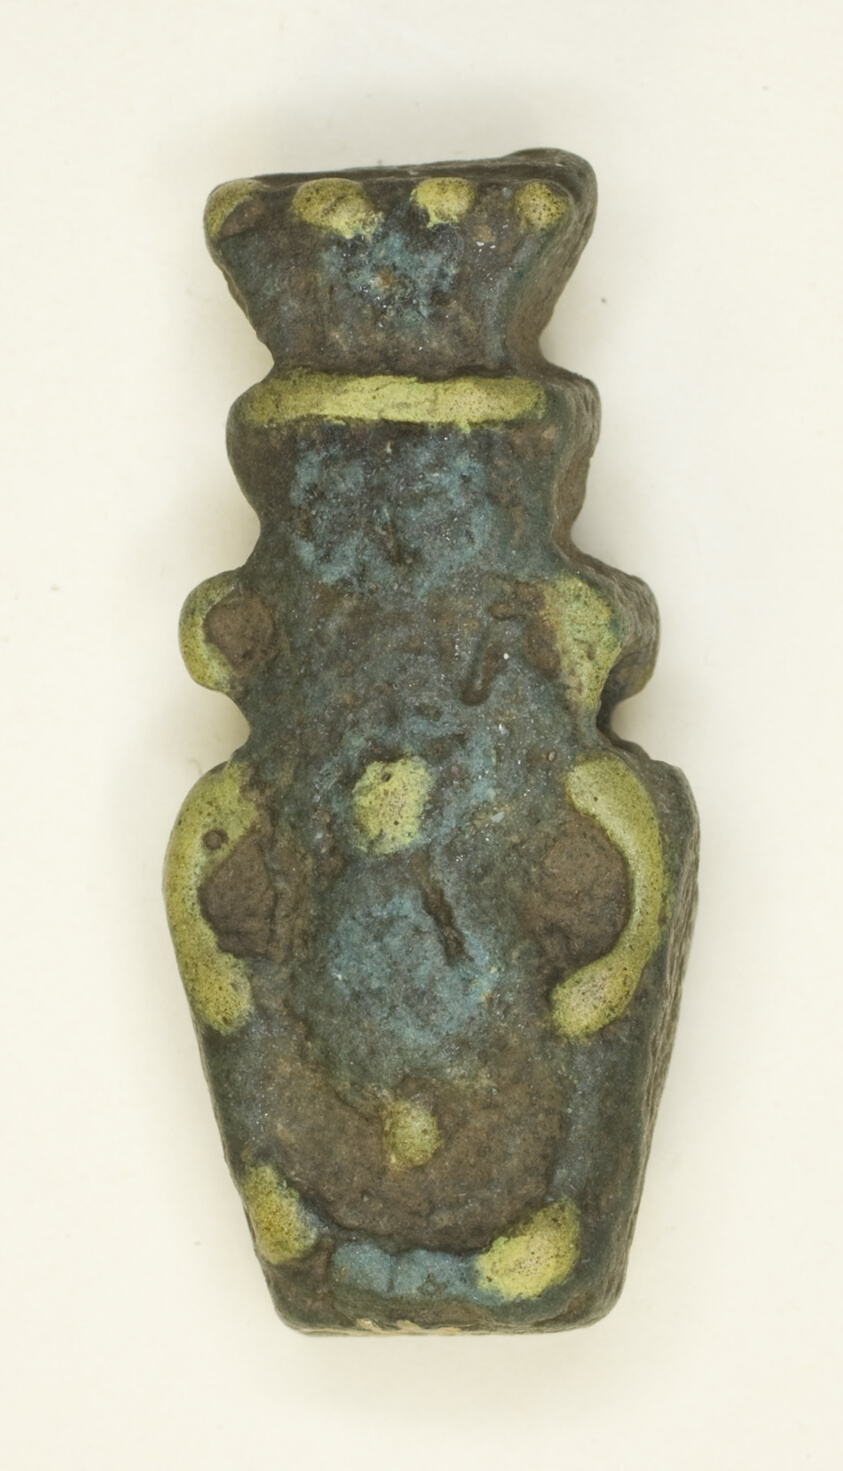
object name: Costume and Accessories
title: Amulet of the God Bes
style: roman period (egyptian), greco-roman (egyptian)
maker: Egyptian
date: Roman Period (30 BCE–395 CE)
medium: Faience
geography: Egypt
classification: amulet; jewelry; ceramics; ancient art; costume; faïence (composite material)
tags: gods (deities)